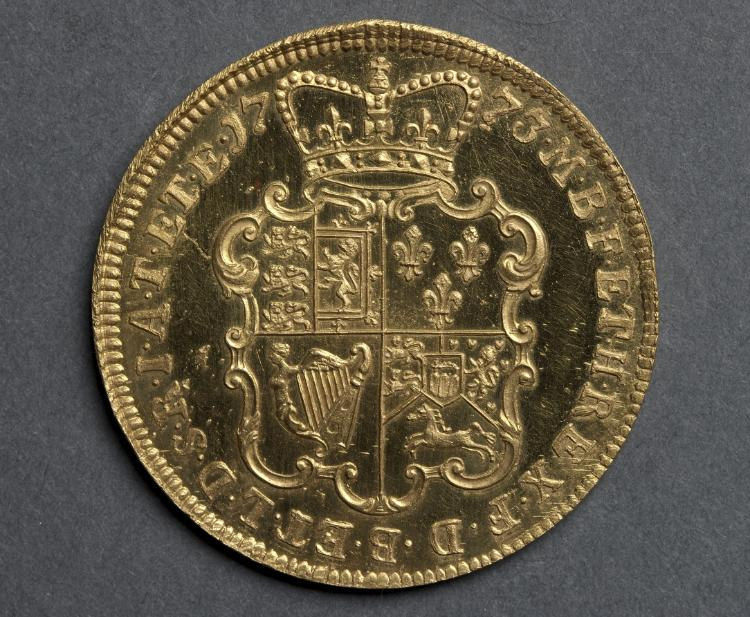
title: Two Guinea Piece: Ornate Crowned Shield of Arms (reverse)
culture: England, George III, 1760-1820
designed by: John Sigismund Tanner (British, 1705–1775)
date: 1773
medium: gold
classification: Coins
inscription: M.B.F.ET.H.REX.F.D.B.ET.L.D.S.R.I.A.T.ET.E.1773.